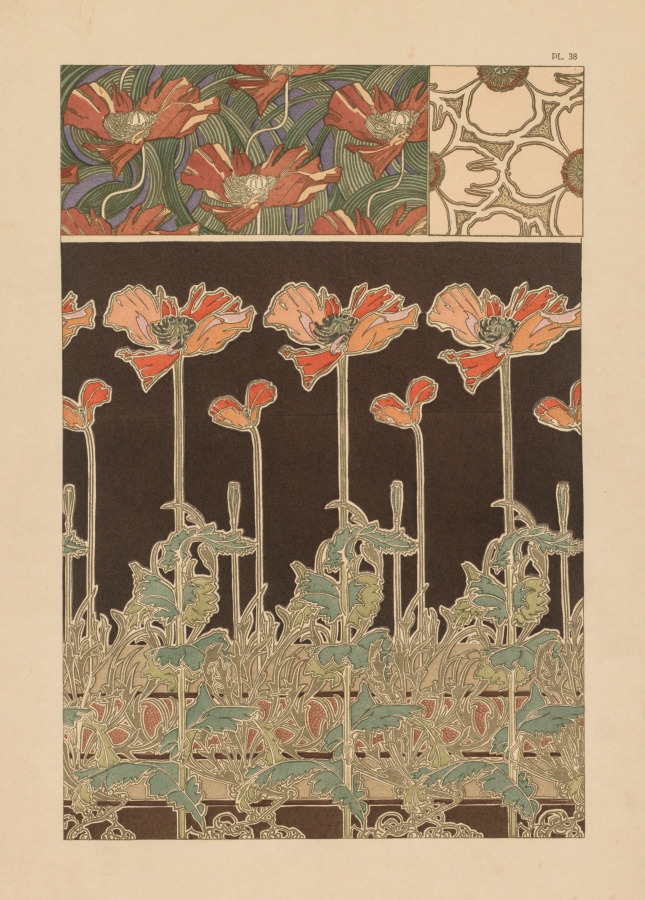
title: Documents Decoratifs: Plate 38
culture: Czechoslovakia, late 19th-early 20th century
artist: Alphonse Mucha (Czech, 1860–1939)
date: 1901–2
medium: lithograph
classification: Print